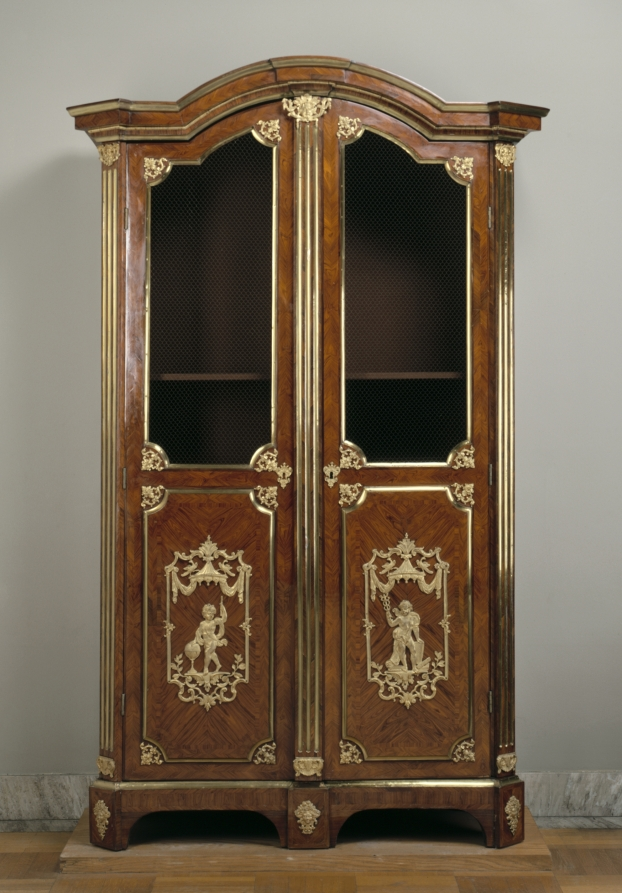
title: Bookcase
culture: France, 18th century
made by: attributed to Charles Cressent (French, 1685–1768)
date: c. 1720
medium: kingwood and rosewood veneers, gilt metal mounts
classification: Furniture and woodwork